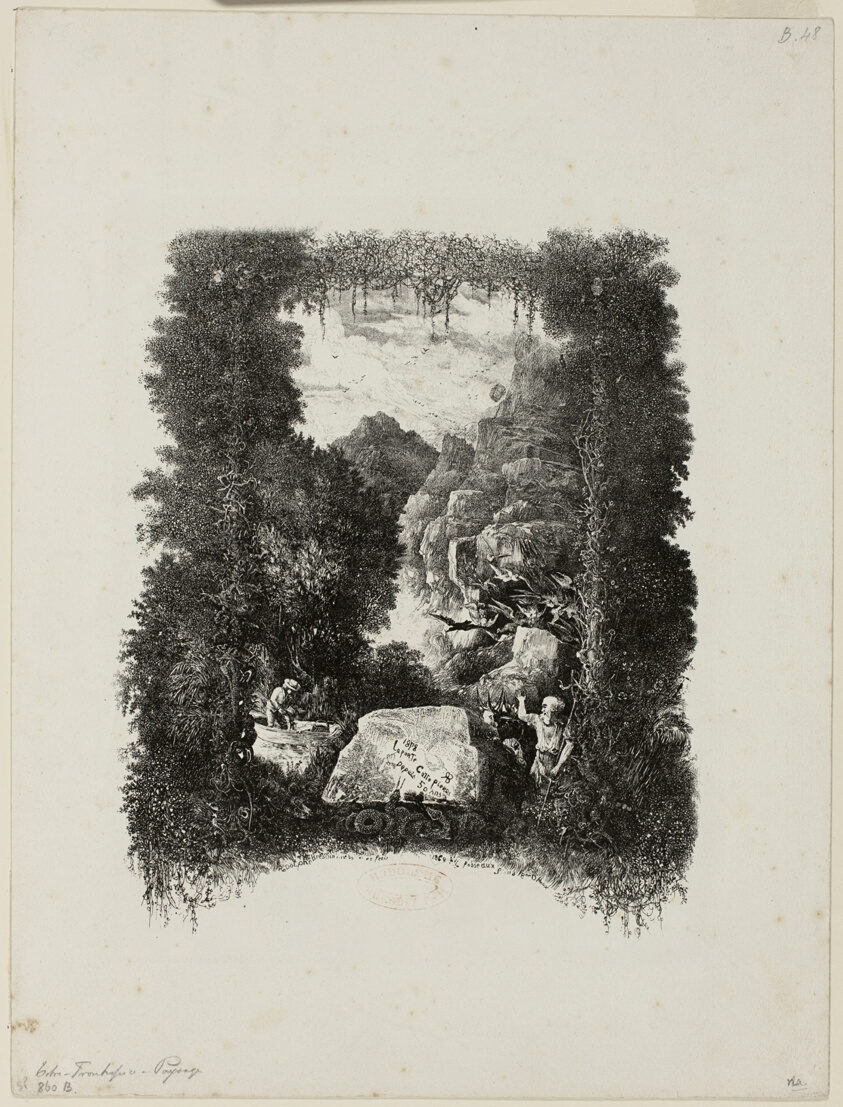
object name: Print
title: Frontispiece for Fables and Tales by Hippolyte de Thierry-Faletans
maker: Rodolphe Bresdin (French, 1825-1885)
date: 1868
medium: Lithograph (etching transfer) on white wove paper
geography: France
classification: lithograph; print; prints and drawing